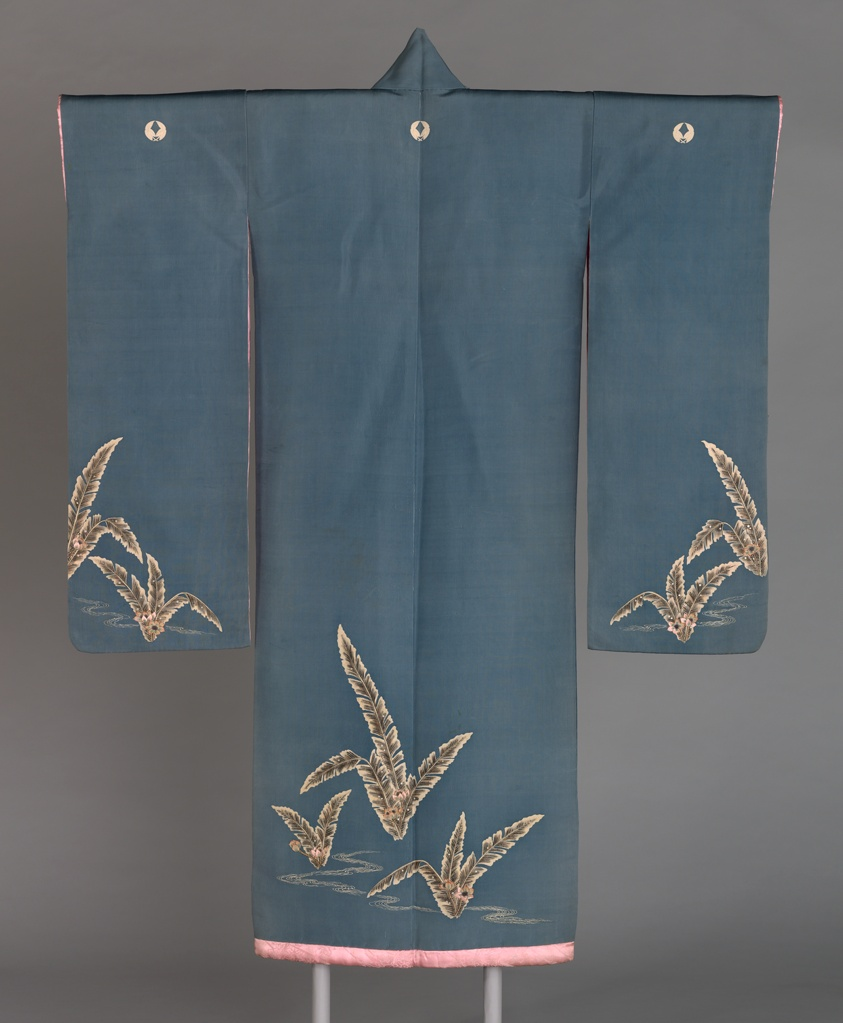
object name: Textile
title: Furisode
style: meiji, Japanism, East Asian, asian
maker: Japan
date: Meiji period (1868–1912), c. 1890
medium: Silk, plain weave (shioze); resist dyed (tsutsugaki and hikizome) and painted with pigment and silver; embroidered with silk and gold-leaf-over-lacquered- paper strip in satin and single back stitches; lined with silk, satin damask weave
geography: Japan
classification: textile; weaving - printed